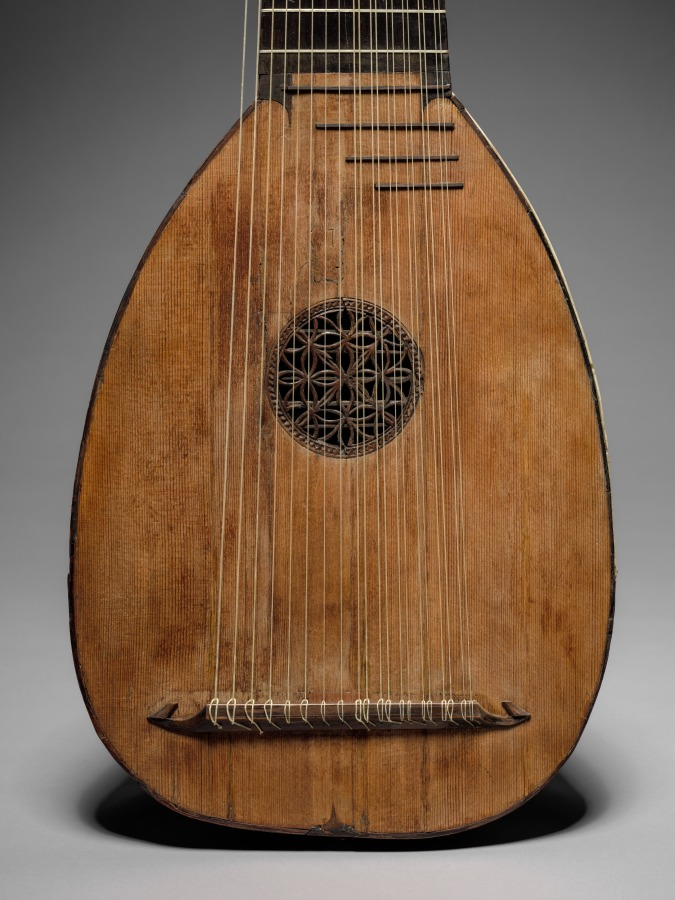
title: Lute or Tiorbino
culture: Italy, probably made in the mid-17th century, but modified by later repair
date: c. 1620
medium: wood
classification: Musical Instrument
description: The lute was the most important musical instrument in secular settings throughout the 16th and 17th centuries. Not only a virtuoso instrument with a huge repertoire, the lute provided the ideal accompaniment for the voice, played an essential role in ensembles, figured in masques and operas, and was played by amateurs as well as professionals. A highly specialized instrument, this tiorbino is a type of long-necked lute resembling a theorbo, but significantly smaller and pitched an octave higher. An object of great rarity, it is one of the smallest Baroque tiorbinos to survive.